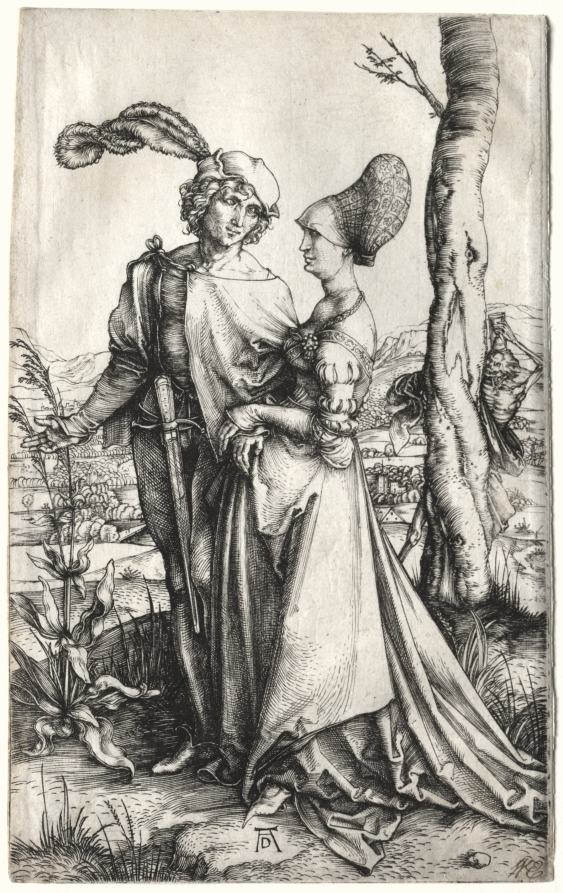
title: The Promenade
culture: Germany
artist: Albrecht Dürer (German, 1471–1528)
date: c. 1497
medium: engraving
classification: Print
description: Balancing an hourglass on his head, Death stalks this fashionable couple strolling in the countryside. When Dürer created this print, figures of Death were moral reminders that life was brief, and they were also associated with the dangers of carnal desire. The improper placement of the man’s sword betrays his dishonorable intentions, while the woman’s bonnet signifies her married status. Their liaison is not innocent, but one of sinful infidelity.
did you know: As if to reinforce the uncertain status of this couple, Albrecht Dürer portrayed the woman stepping on the hem of her gown.